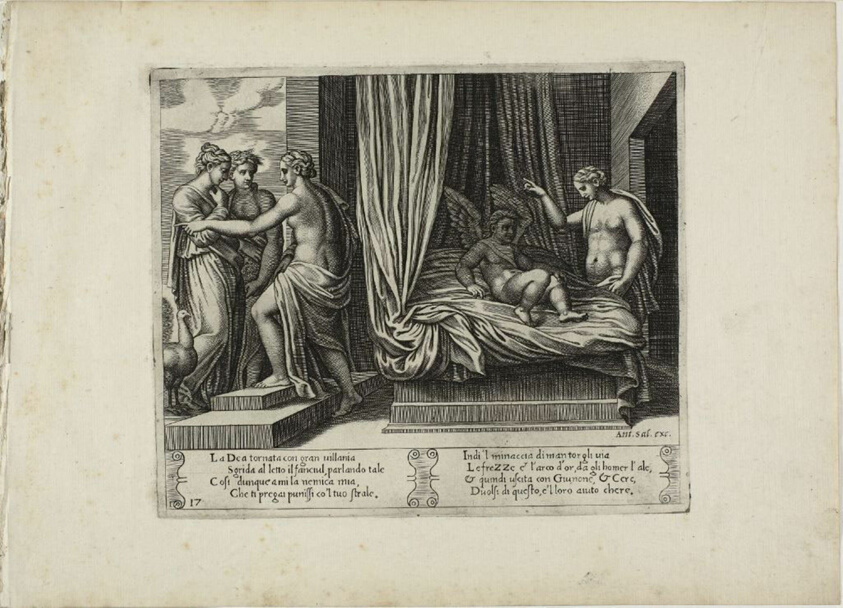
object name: Print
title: Venus Reprimanding Her Son, from The Story of Psyche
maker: Master of the Die (Italian, active c. 1530-1560); after Michiel Coxcie I (Flemish, 1499-1592); in turn, inspired by Raffaello Sanzio, called Raphael (Italian, 1483-1520)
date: 1530/40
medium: Engraving in warm brown ink on cream laid paper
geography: Italy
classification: engraving; print; prints and drawing